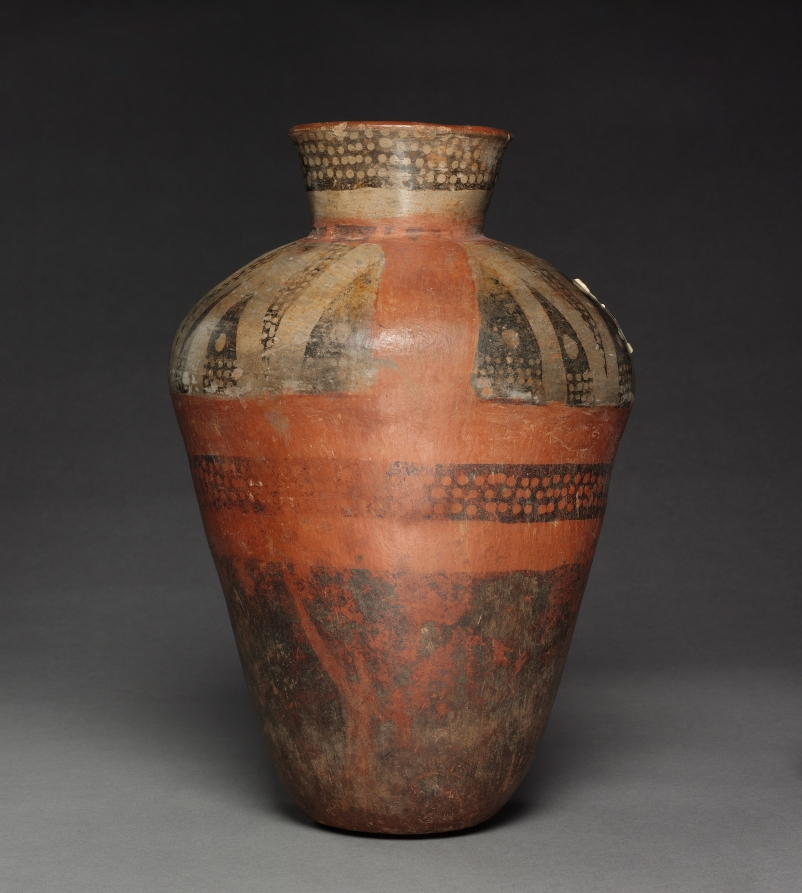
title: Vase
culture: Colombia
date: 1000–1550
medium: pottery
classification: Ceramic